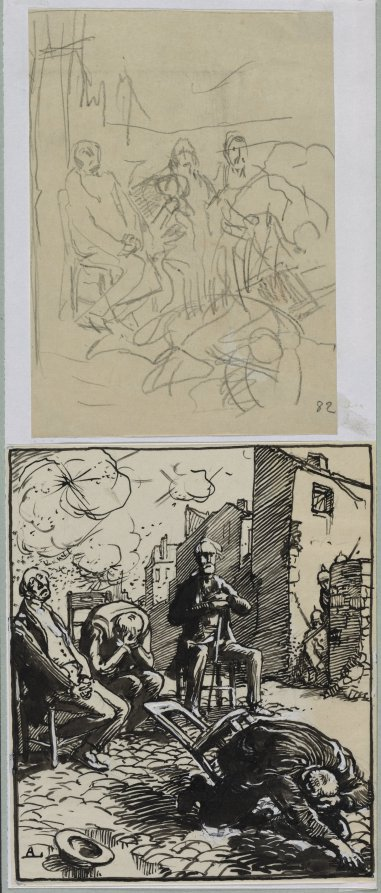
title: Trois otages assis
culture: France, 20th century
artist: Auguste Louis Lepère (French, 1849–1918)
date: 1914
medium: pencil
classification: Drawing